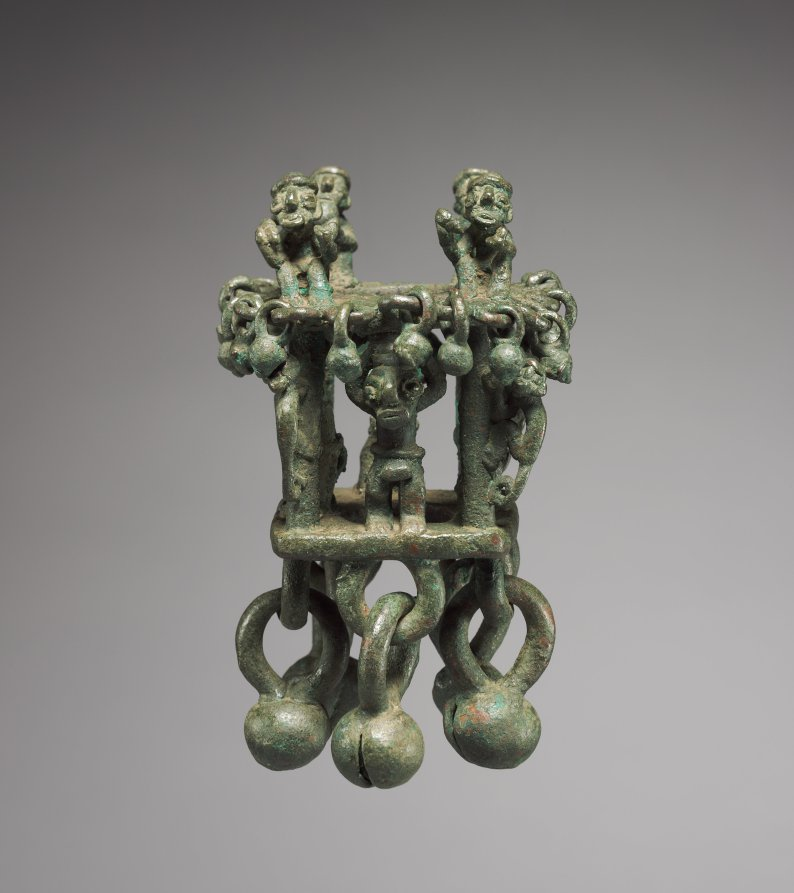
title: Finial of a Staff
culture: Peru, North Coast, Chimú style (900-1470)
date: Chimú style (900–1470)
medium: cast copper alloy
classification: Metalwork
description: Look carefully at this scepter top; the corrosion obscures details, but the scene is interesting.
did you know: Many ancient Andean artworks incorporate the element of sound.